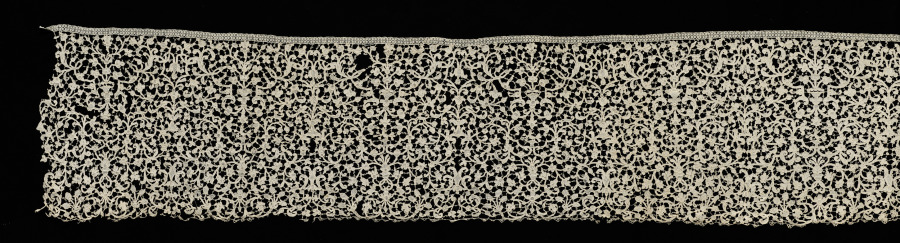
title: Lace Flounce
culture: Italy, Venice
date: 1660–99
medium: Needle lace (Venetian Rose Point-Punto Rosallino)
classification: Lace